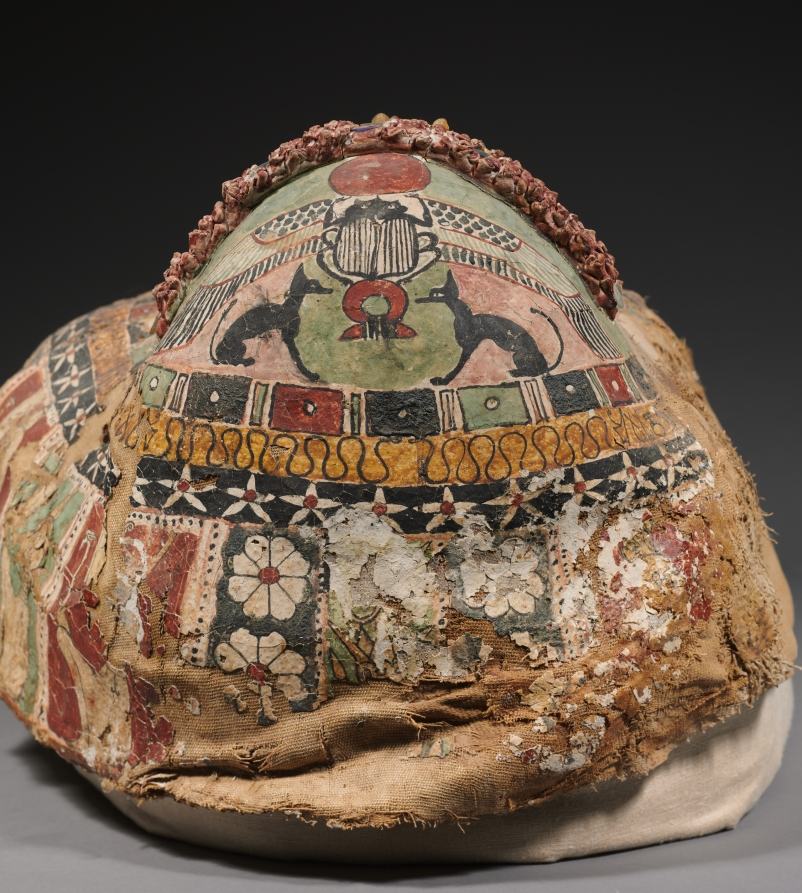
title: Cartonnage Mummy Case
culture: Egypt, Greco-Roman period (332 BCE–395 CE), Ptolemaic dynasty (305–30 BCE)–Roman empire (30 BCE–395 CE)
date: c. 50 BCE–50 CE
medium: cartonnage, painted and gilded, with glass inlays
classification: Funerary Equipment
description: This mummy case is made of cartonnage, a material similar to papier-mâché, but using layers of linen rather than paper. Cartonnage mummy cases such as these are contemporary with funerary portraits painted on wood or linen, although they present a very different appearance. The face, modeled in plaster, is bland and idealized, although the effect of the gilding and glass inlays is quite dazzling. The body is painted with traditional, age-old funerary motifs: the god Osiris, seated and mummiform; the fetish of Abydos, holy city of Osiris, flanked by standing deities (Thoth and Shu); a Horus falcon with outspread wings, and the bark of Sokar. Below these are the sandaled feet of the deceased. On the sides are rows of seated deities. On the top of the head are a winged scarab beetle flanked by Anubis jackals. On the foot are painted the soles of the deceased’s sandals, flanked by scorpions for protection.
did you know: This coffin is smaller and later in date than the other coffins in this gallery. It is made of cartonnage, which used layers of linen to create a material similar to papier-mâché. The painted portrait head displays the influence of Roman portraiture at this time and incorporates both gilding and glass inlays. Despite the fragile materials, this mummy case survived due to the very dry desert climate in which it was found.